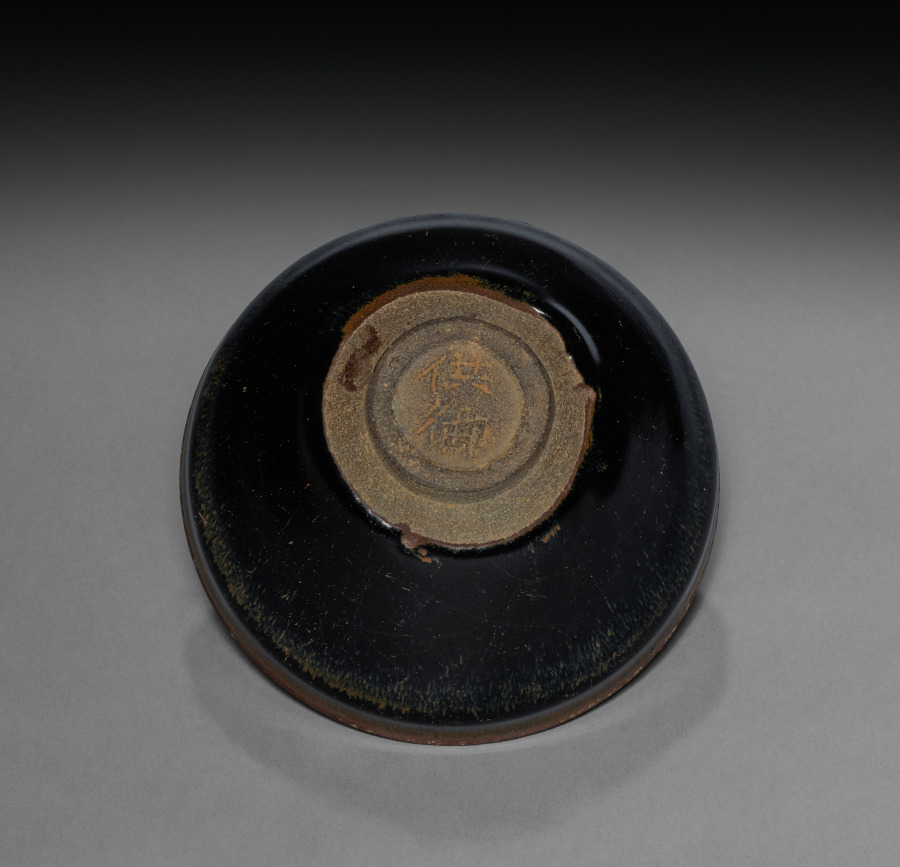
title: Black-Glazed Teabowl with Incised Characters (供御) for “Imperial Tribute”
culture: China, Fujian Province, Southern Song dynasty (1127-1279)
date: 1100s–1200s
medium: Brown-glazed stoneware, Jian ware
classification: Ceramic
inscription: 供御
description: Teabowls with incised characters are rare. The characters 供御 (gongyu; “imperial tribute”) incised on the base of this bowl suggest that it was local annual tribute ware presented to the court. The abrasions on its rim indicate the cup was originally mounted with a metal ring that has been removed. Teacups, occasionally dressed with metal bands to cover the rough, thinly glazed lip, enhanced the experience of tasting tea and rendered the bowl more precious and appealing. When steeped tea leaves were introduced in China, dark-glazed bowls fell out of favor, but such bowls continued to be treasured in Japan where powdered tea (matcha) remained popular.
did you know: Jian ware was commonly associated with tea drinking and tasting, as the light color of tea contrasted nicely with the dark glazes of the ceramics.